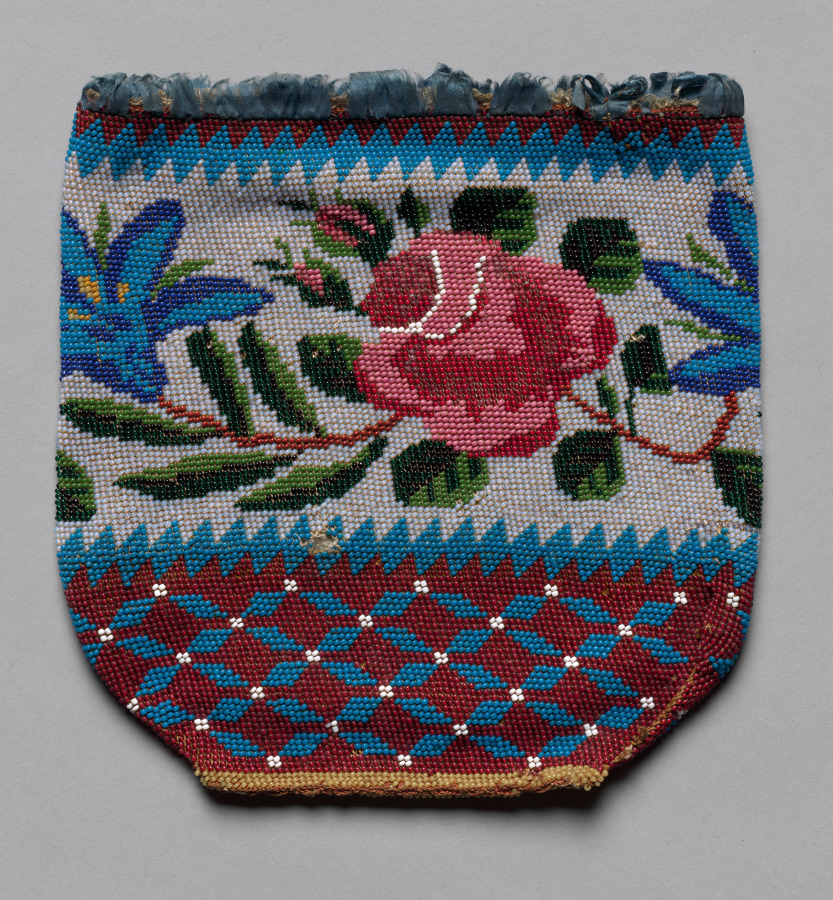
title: Beaded Bag (floral motif)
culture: America, early 19th century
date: early 19th century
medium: glass beads, cotton? lining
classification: Garment